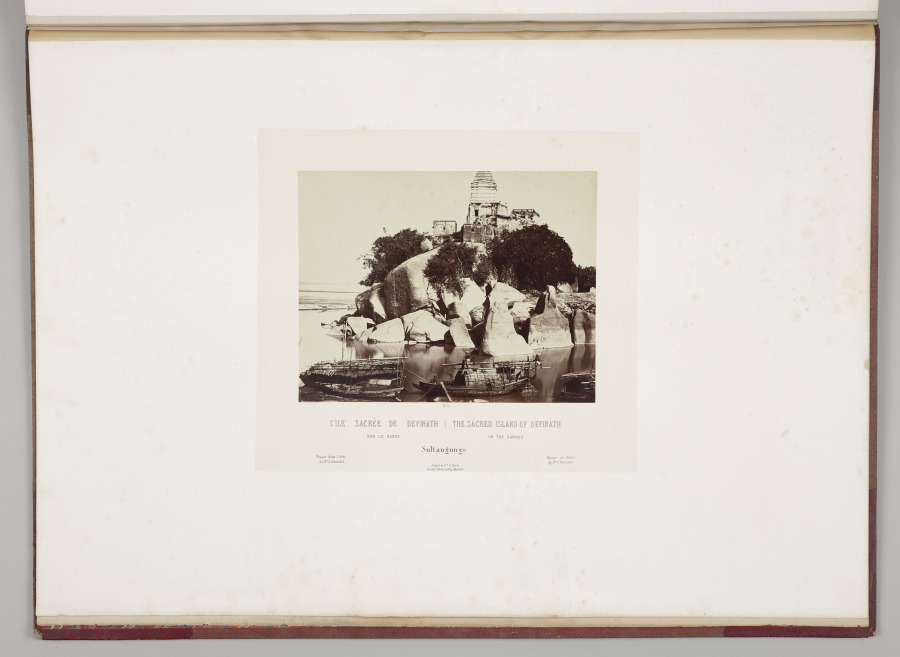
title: The Sacred Island of Devinath on the Ganges, Sultangunge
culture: France, 19th century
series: India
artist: Louis-Théophile Marie Rousselet (French, 1845–1929)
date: 1865–68, published 1869–70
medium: Albumen print from glass plate negative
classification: Photograph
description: Concerned that his drawings did not do justice to the splendor of India’s monuments, Rousselet learned photography in India that year, a remarkable accomplishment. He proved to be a talented photographer with a sophisticated sense of composition. The scenes in this volume sweep across sites of Sultanate, Rajput, and Mughal power in northern India, from the sacred Hindu city of Varanasi on the Ganges River to Alwar in Rajasthan. Also included are several scenes of industry and portraits of Indian rulers.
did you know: Louis Rousselet described himself as a “scientific traveler” when he went to India alone at age 18 in 1863 and stayed into 1868.